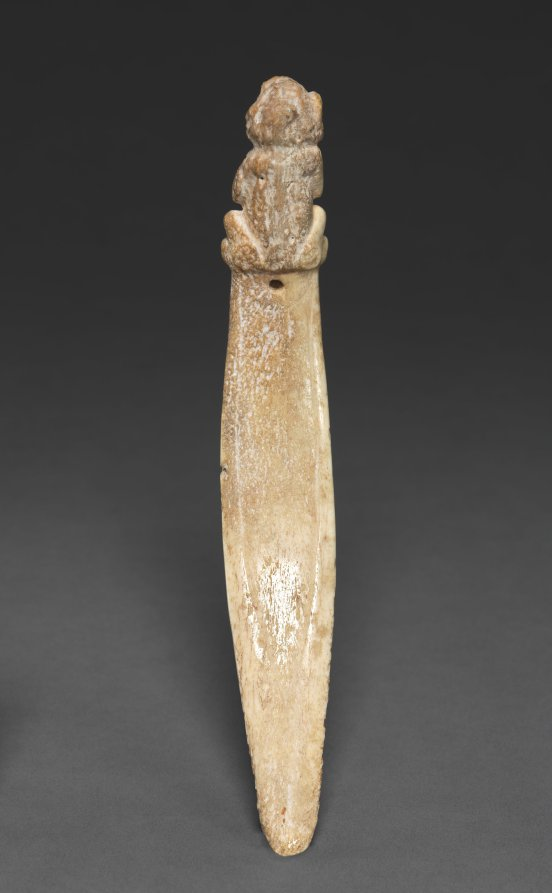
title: Spatula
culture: Caribbean, Greater Antilles, Taino, 10th-15th century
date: 900–1492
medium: manatee bone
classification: Sculpture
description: In 1492, when Christopher Columbus sailed into the Caribbean, the islands of Cuba, Hispaniola (Haiti and the Dominican Republic), Jamaica and Puerto Rico were inhabited by the Taino people. Taino religious ceremonies often included the snuffing of hallucinogenic herbs to alter the consciousness and facilitate contact with the spirit world. Carved spatulas were used to blend the powdered herbs. After purifying the body through purging the stomach, the snuff was inhaled into both nostrils.